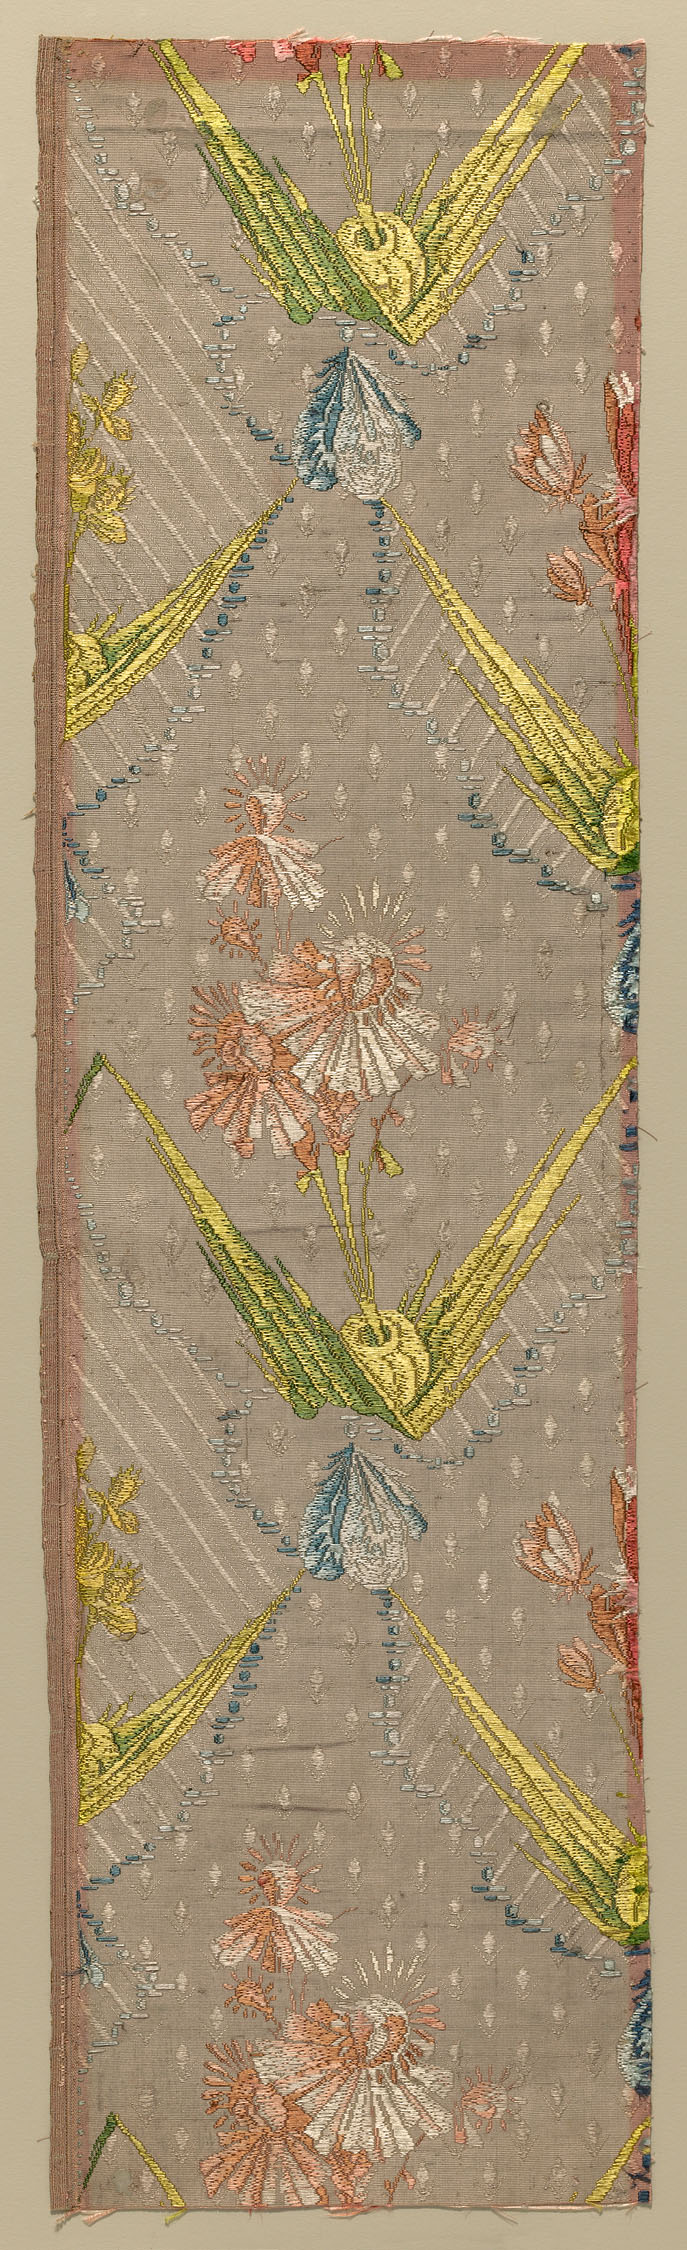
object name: Textile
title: Fragment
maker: France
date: 1725/1775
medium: Plain weave with addition pattern wefts; brocaded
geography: France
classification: textile; weaving